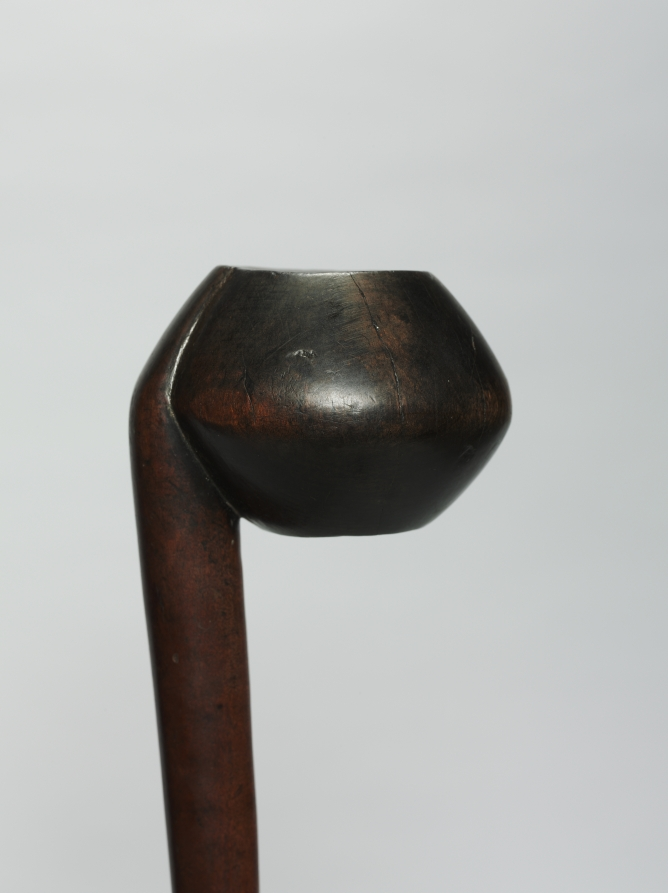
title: Club (Knobkerrie)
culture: Southern Africa, South Africa, Northern Ngun-style or Zulu-style maker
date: late 1800s or early 1900s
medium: Wood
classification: Arms and Armor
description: Relatively short sticks historically used for hunting and fighting are customarily called knobkerries. A combination of Afrikaans and Shona words, the name refers to the characteristic spherical knob of wood (knop) or head atop a cylindrical shaft (kirri). The knobs on these were carved into a tight whorl and a compressed sphere with a central rib. Even though their basic shapes were derived from real weapons, many of these precious objects were rarely if ever used as such. Highly personal, they instead functioned as ceremonial display items or regalia, symbolizing the masculinity and prowess of their owner.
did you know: The term knobkerrie refers to a characteristic spherical knob of wood or head atop a cylindrical shaft.